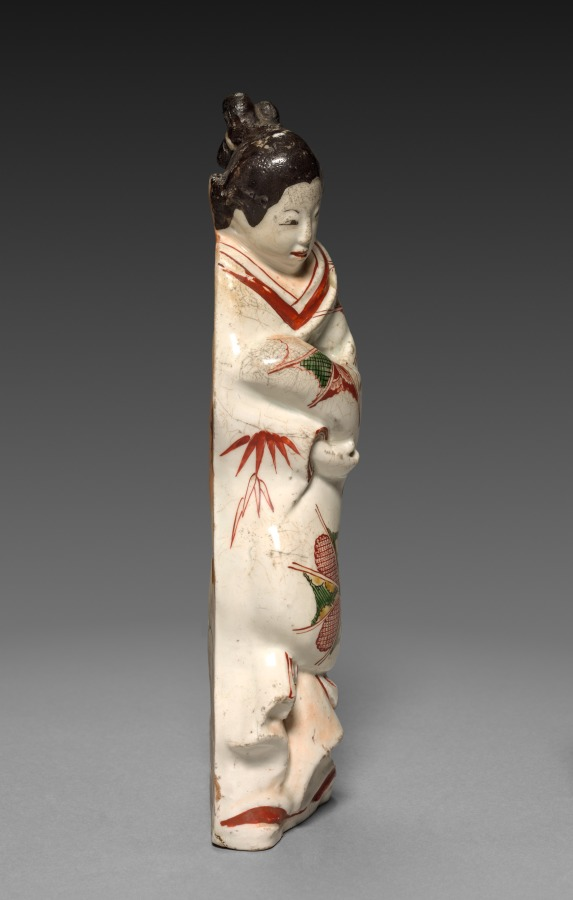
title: Standing Figure of a Beauty: Arita Ware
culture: Japan, Edo period (1615–1868)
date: 1600s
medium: porcelain with overglaze enamel decoration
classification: Ceramic